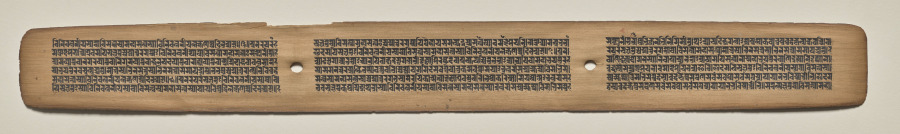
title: Text, Folio 134 (recto), from a Manuscript of the Perfection of Wisdom in Eight Thousand Lines (Ashtasahasrika Prajnaparamita-sutra)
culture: Eastern India, Bihar, Vikramashila Monastery. Painting: Nepal, Kathmandu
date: Sunday, September 14, 1119 (year 239 of the Newar Samvat in the month of Ashvina)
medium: gum tempera and ink on palm leaves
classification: Painting